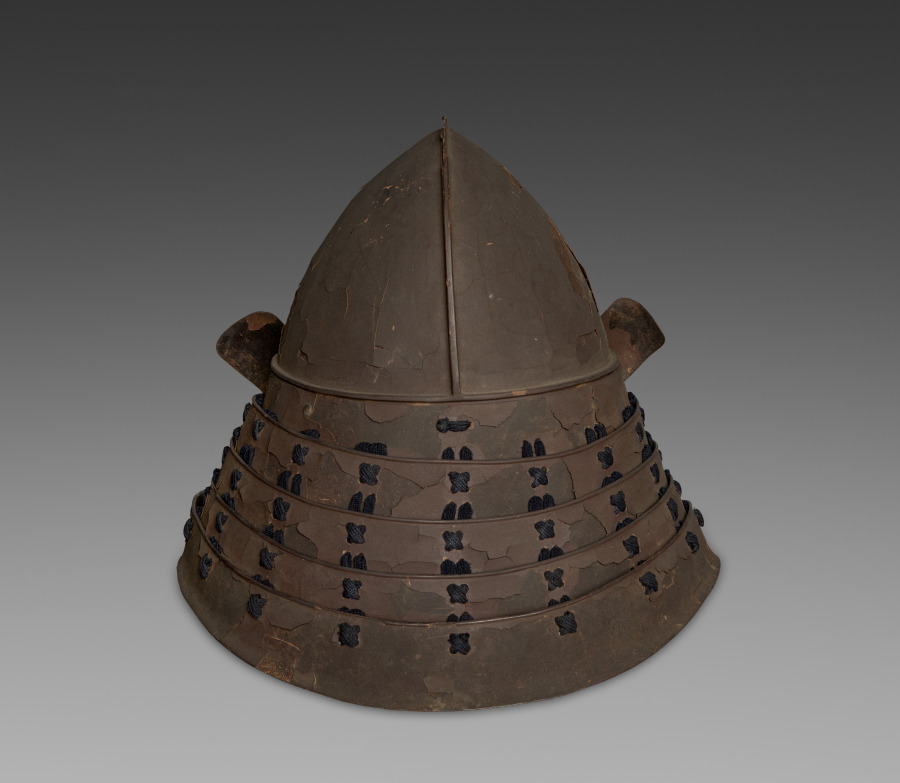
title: Helmet (Kabuto)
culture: Japan, Edo period (1615–1868)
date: 1615–1868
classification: Arms and Armor